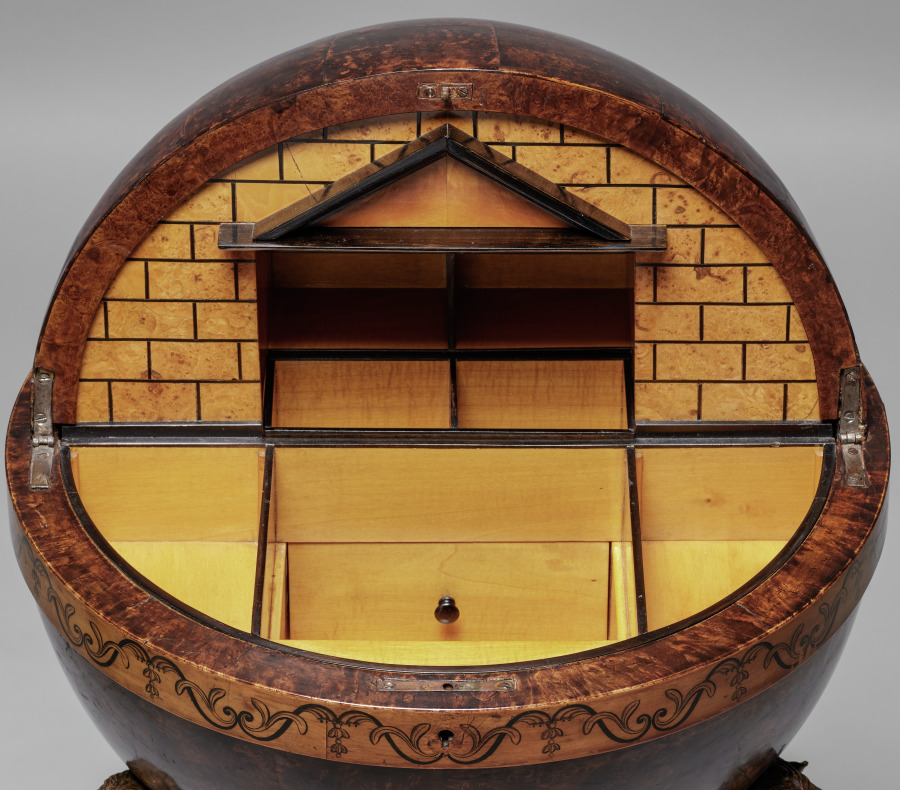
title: Globe Work Table (Globustisch)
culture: Austria, Vienna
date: c. 1810–15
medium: Burl walnut veneer, mahogany, ebony, satinwood, gilt wood, painted wood; mirrored glass; metal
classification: Furniture and woodwork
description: Work tables resembling globes were the usual form for a lady's sewing or writing table around 1800 in Austria. Combining moving parts, secret compartments, and highly finished decoration, these tables were also a way for the cabinetmaker to show off his skill. The tripod supports and temple-like architectural quality of both the exterior and interior decoration reflect the fashionable taste for neoclassical style, or Biedermeier as it was called in Austria, where Vienna was the center of such elaborate furniture production.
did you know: The top half of the globe rotates upward to reveal hidden compartments for sewing tools, threads, and unfinished fabric pieces.